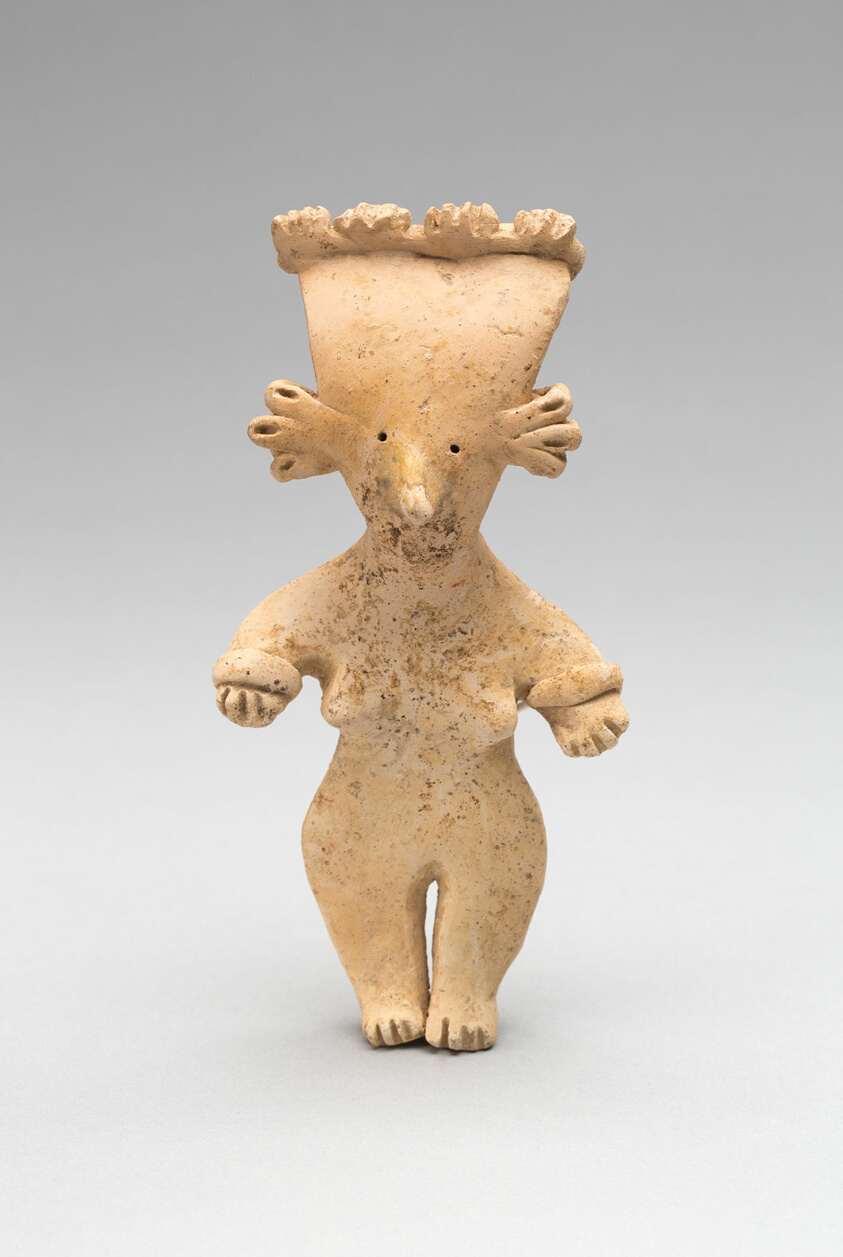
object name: Sculpture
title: Female Figure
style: nayarit, Arts of the Americas, mesoamerican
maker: Nayarit, Chinesco style; Nayarit, Mexico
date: 100 BCE–300 CE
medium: Ceramic and pigment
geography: Nayarit state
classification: earthenware; art of the americas; ceramics; sculpture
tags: people